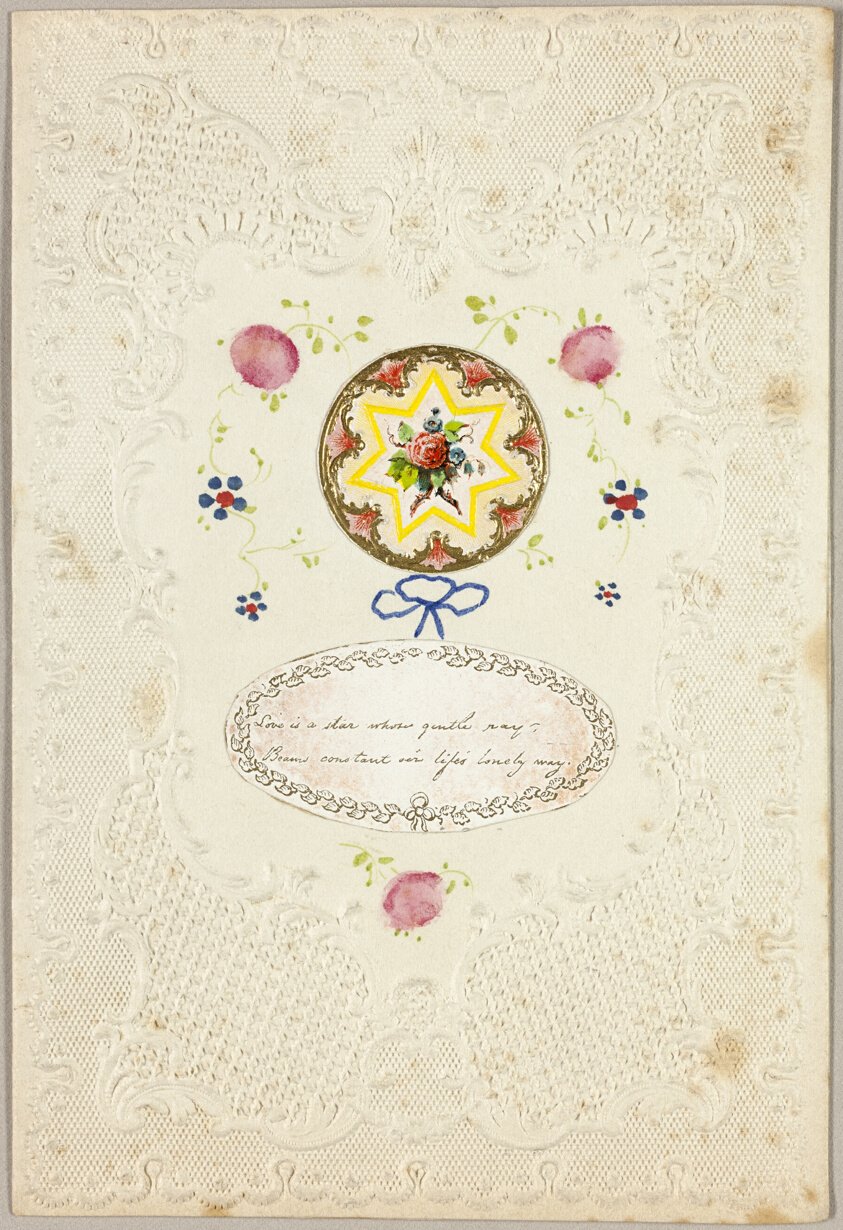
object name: Drawing and Watercolor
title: Love is a Star (Valentine)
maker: Unknown Artist; American or English, 19th century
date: c. 1840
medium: Collaged elements and watercolor on embossed ivory wove paper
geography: United States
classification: collage; valentine; prints and drawing; paper